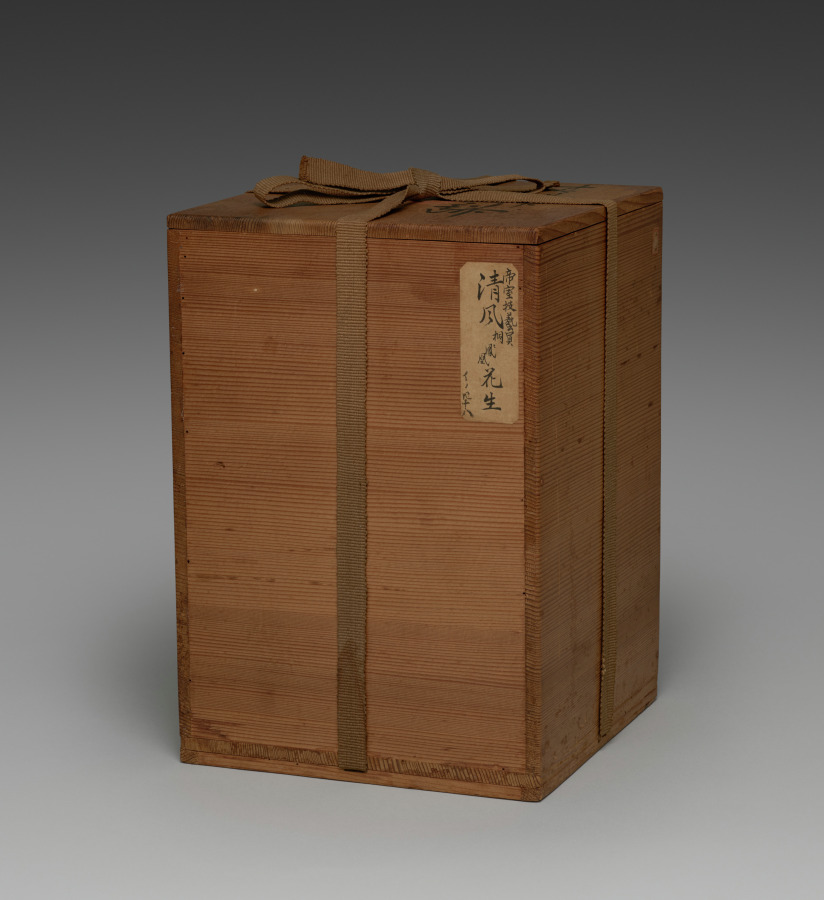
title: Flower Vase with Phoenix in Paulownia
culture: Japan, Meiji period (1868–1912)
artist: Seifū Yohei III (Japanese, 1851–1914)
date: 1897–1914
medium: Porcelain with molded and carved design and underglaze color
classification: Ceramic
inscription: 清風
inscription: 清風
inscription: 清風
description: The phoenix’s commanding presence on this vase was created by adding clay to the surface of the white clay body and then intricately molding and carving it. Then cobalt blue was used to paint the paulownia tree upon which the phoenix perches. Yohei III used a masking technique, covering the phoenix with paper before adding pink color to the area surrounding it. Firing with an allover transparent glaze created a glossy surface, with the phoenix standing out boldly from the background. The mythical bird’s long tail sweeps majestically around the vessel so that one must move around it to see the eyespots in its plumes. A symbol of imperial power in both China and Japan, the phoenix is said to alight only in the paulownia tree. Upon close inspection of its face, one can see that the phoenix’s eye is in yellow under the glaze. The scene is set off at the bottom with a double band of underglaze blue above an incised ring of cloud. Once Yohei III had created his creamy translucent taihakuji glaze, he began applying it over the entire surface of an ivory clay body with motifs in low relief to achieve a creamy white-on-white design. He then began using the combination of gradated pink around raised motifs on a typical white porcelain clay body like the one for this vase. He masked his low-relief designs with paper before sprinkling diluted iron oxide glaze onto the surrounding areas through a net with a brush. These unpigmented elements stand out as starkly white against the gentle pink blush color that surrounds them. Still later, he added pink to the translucent creamy glaze he used in kanpakuji works and used it over motifs in relief on an ivory clay body for an overall pink-tinged cream effect (see CMA 2022.198).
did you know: In 1893, Seifū Yohei III became the first ceramist to be appointed as an Imperial Household Artist under a system introduced by the Japanese government in 1890.